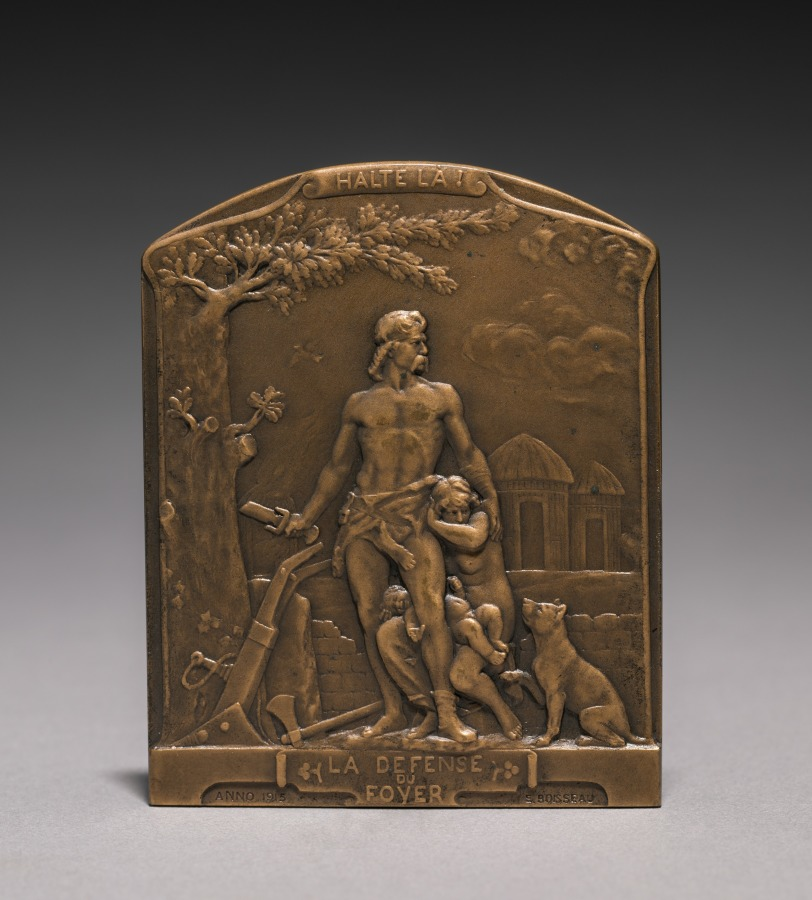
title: Medal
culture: France, 20th century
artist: Emile André Boisseau (French, 1842–1923)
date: 1914–1918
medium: bronze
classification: Metalwork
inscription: above: "Halte là"; below: "La defense du foyer."